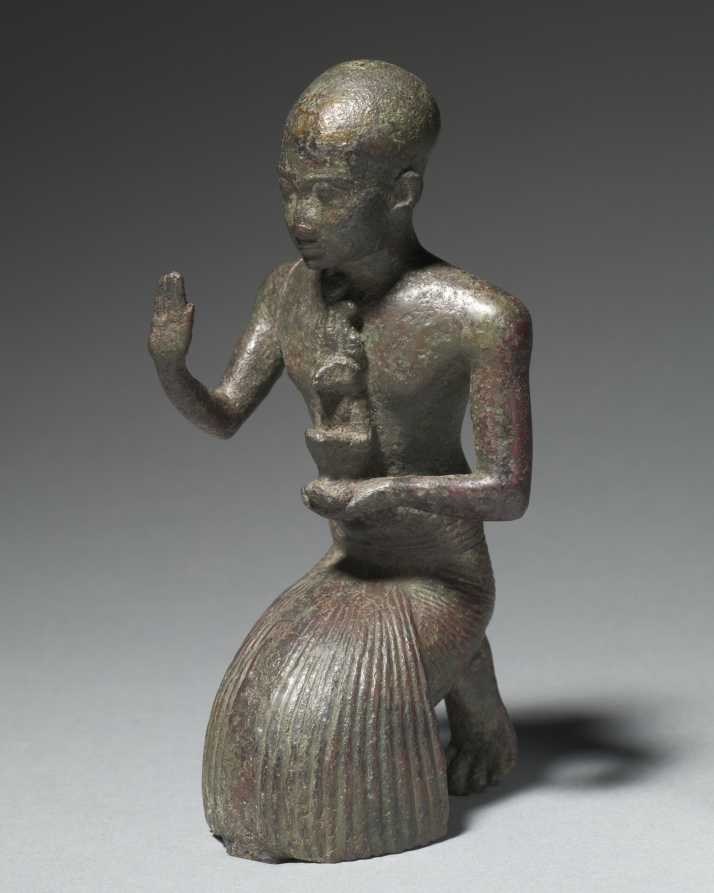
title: Statuette of a Kneeling Priest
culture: Egypt, New Kingdom (1540–1069 BCE), Dynasty 20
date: 1186–1069 BCE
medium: tin-bronze alloy, probably leaded, hollow cast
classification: Sculpture